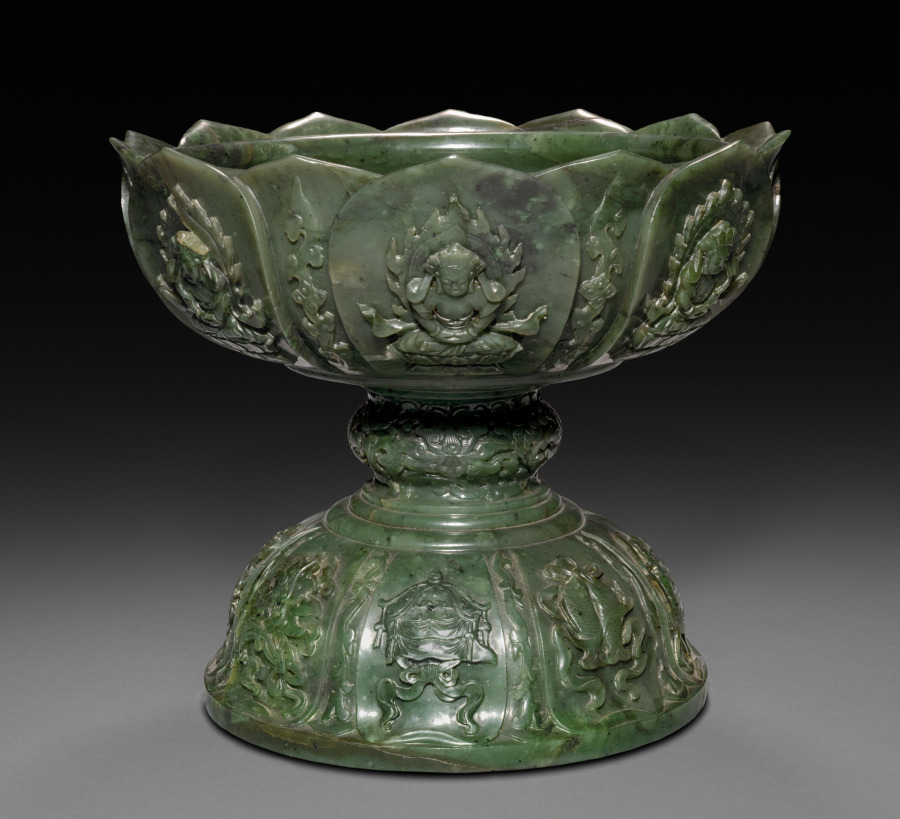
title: Offering Container in Form of Alms Bowl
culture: China, Qing dynasty (1644-1911)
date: 1700s or later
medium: jade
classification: Jade